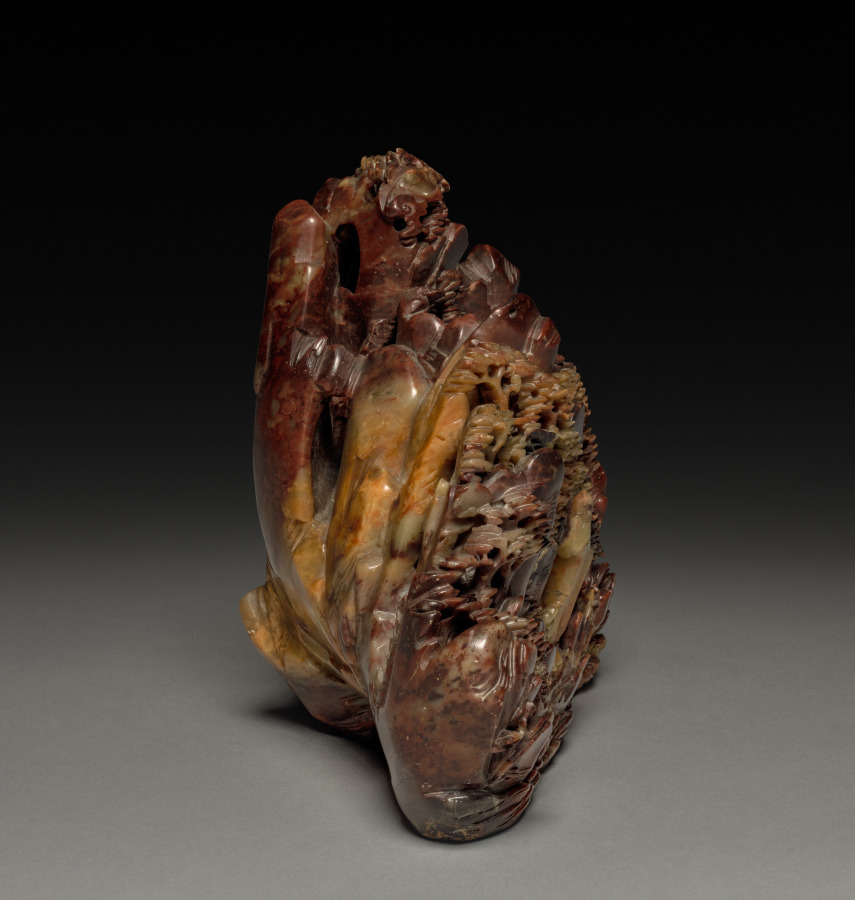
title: Landscape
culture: China, Qing dynasty (1644-1911)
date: 1644–1911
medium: soapstone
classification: Stone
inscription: 石門洞天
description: A mountain scenery surrounded by water and fish is meticulously carved out of soapstone, with a pond, bridge, waterfall, and temple front in its center. The unidentified figure scene on the left includes an ox and a man wearing what appears to be a Korean hat. A Buddha figure hidden in the depth of the temple can be glimpsed from the backside. The inscribed pillar on the right reads “Stonegate Cave to Heaven (shimen dongtian)”. Indentations all over the stone suggest that the miniature mountain was once adorned with precious stones and metal, presumably representing an earthly paradise to which one could escape in one’s mind and imagination.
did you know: A waterfall plummets down the cliff by the temple and then flows smoothly down to join the river at the front of the landscape scene.